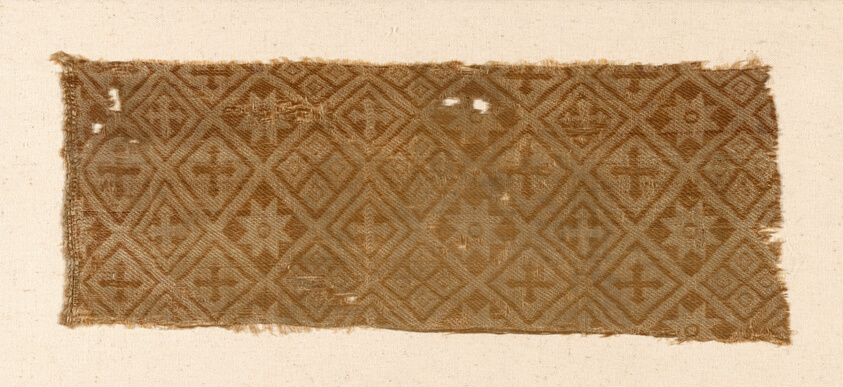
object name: Textile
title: Fragment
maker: Italy or Spain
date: 13th century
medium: Silk, complementary weft twill weave with inner warps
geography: Italy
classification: textile; weaving